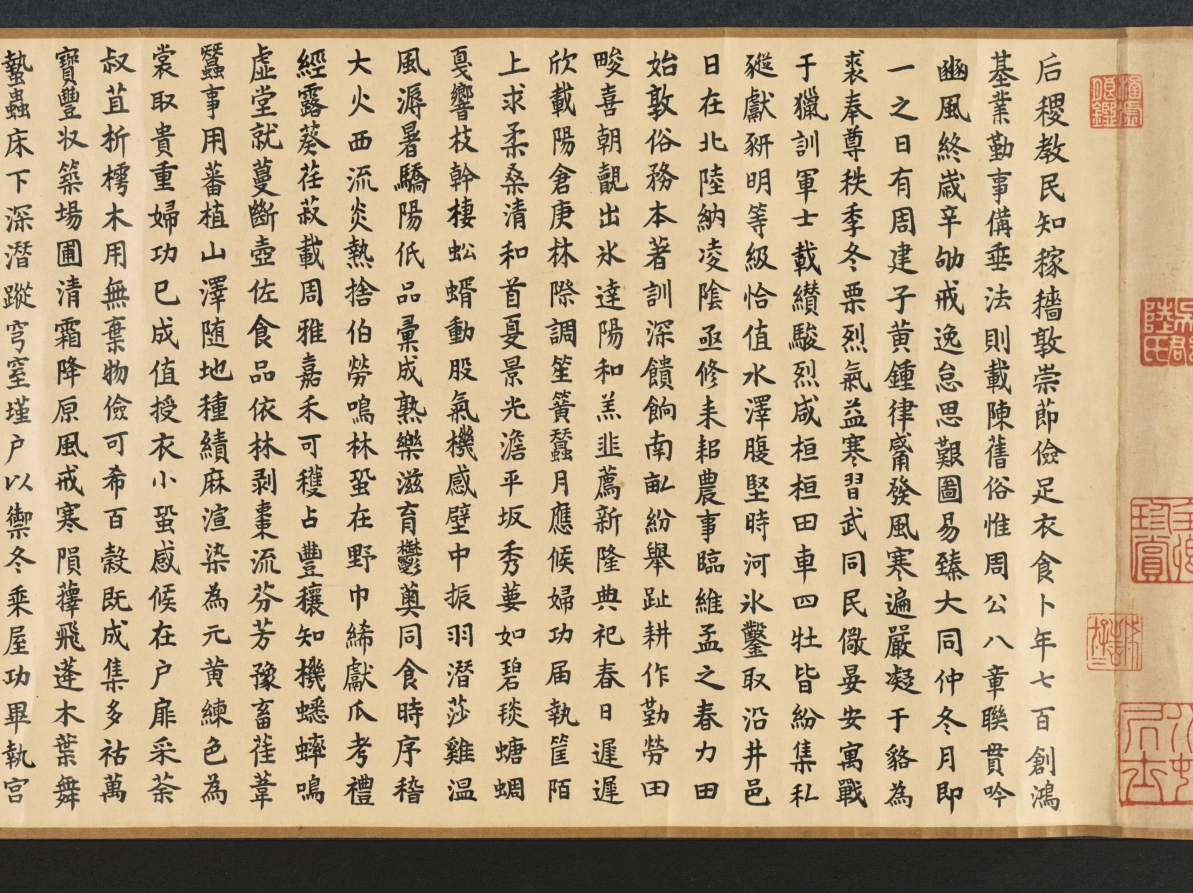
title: "Seventh Month" from the Odes of Bin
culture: China, Southern Song dynasty (1127-1279)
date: 1200s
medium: Handscroll; ink and color on silk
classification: Painting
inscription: Colophons: 1. [on the frontispiece] by the Qianlong emperor (dated 1741). 2. by Lu Wan (dated Zhengde dingchou, 1517). 2. by the Jiaqing emperor (dated 1807).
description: According to Confucian thought, the ruler looks after the well-being of his people which involves agricultural activities. Seventh Month from the ancient Odes of Bin in the Shijing (Book of Poetry) describes occupations throughout the year, including plowing, harvesting, hunting, making clothes, and observing rituals. The earliest illustrations of these Odes accompanied by text were commissioned by Southern Song emperor Gaozong (reigned 1127–1162). As the lower Yangzi delta had become the new seat of government, Gaozong had sets of these illustrations produced by court artists to revive the dynasty and convince the Confucian officialelite of his legitimacy to rule.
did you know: The Odes of Bin appears in the classic Shijing (Book of Poetry), an anthology of more than 300 poems, folk songs, and ceremonial hymns that were originally chanted to music.